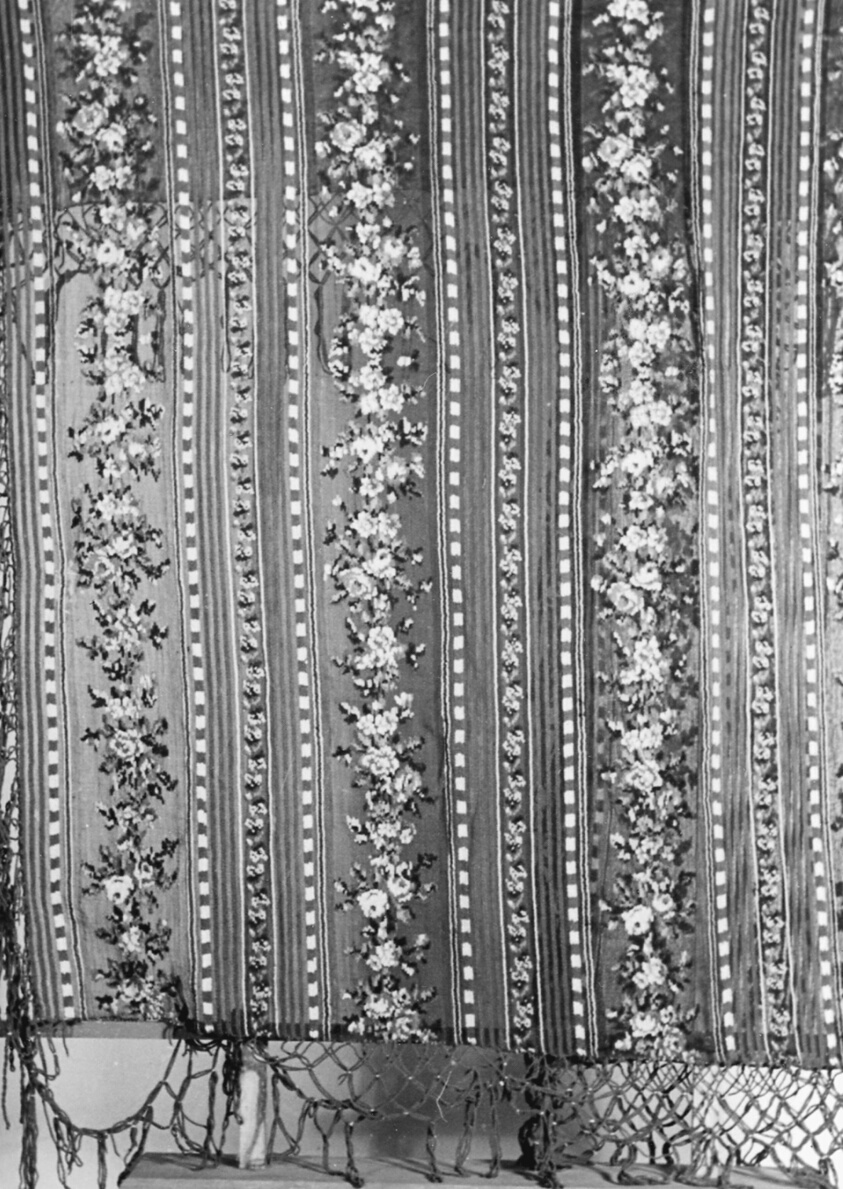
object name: Costume and Accessories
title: Shawl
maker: United States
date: 1825/75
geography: United States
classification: textile; needlework (visual works); costume; dress (garment); clothing